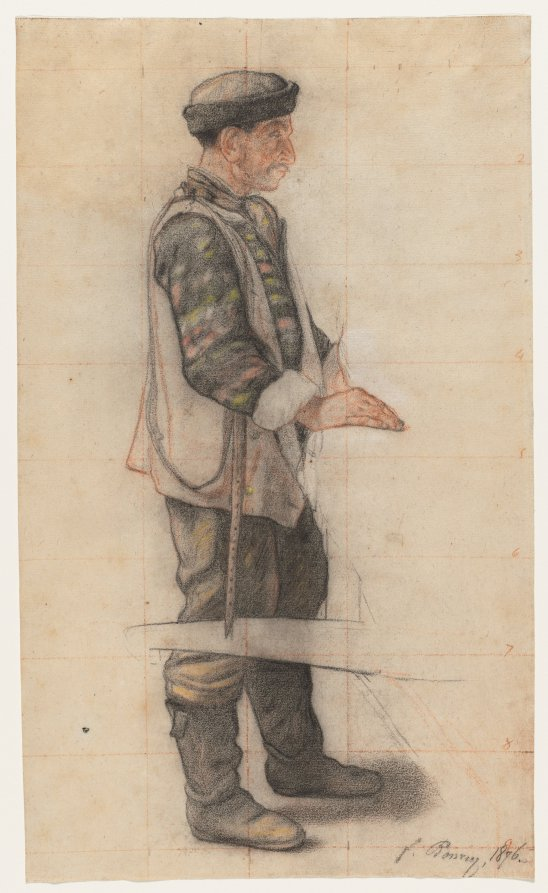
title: The Stretcher Bearer (Study for "Le Couvreur tombé")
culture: France, 19th century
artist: François Bonvin (French, 1817–1887)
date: 1876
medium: black and red chalk with colored chalks, stump work and graphite accents, squared for transfer in red chalk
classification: Drawing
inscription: Signed and dated in black chalk, lower right: F. Bonvin, 1876